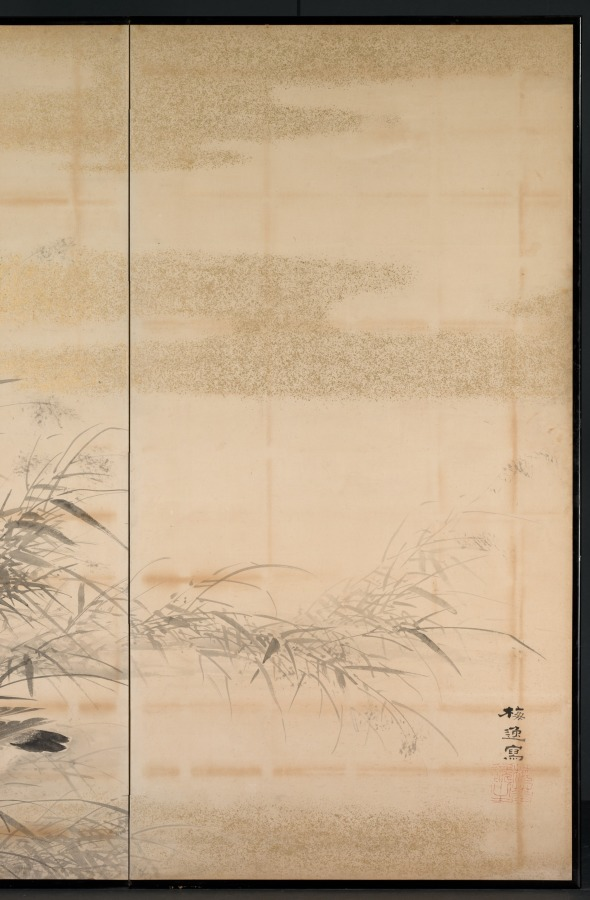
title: Geese, Reeds, and Water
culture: Japan, Edo period (1615–1868)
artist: Yamamoto Baiitsu (Japanese, 1783–1856)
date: 1800s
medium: One of a pair of four-panel folding screens; ink, color, and cut gold foil on paper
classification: Painting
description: This byōbu composition differs from most in that it comprises two four-panel screens, rather than two six-panel units. Since the current mounting is modern, it is impossible to determine whether its present configuration represents its original design. Some panels may have been removed to help the screens better fit into a modern interior space. Baiitsu worked almost exclusively in monochromatic ink tones and favored classical Chinese painting themes.